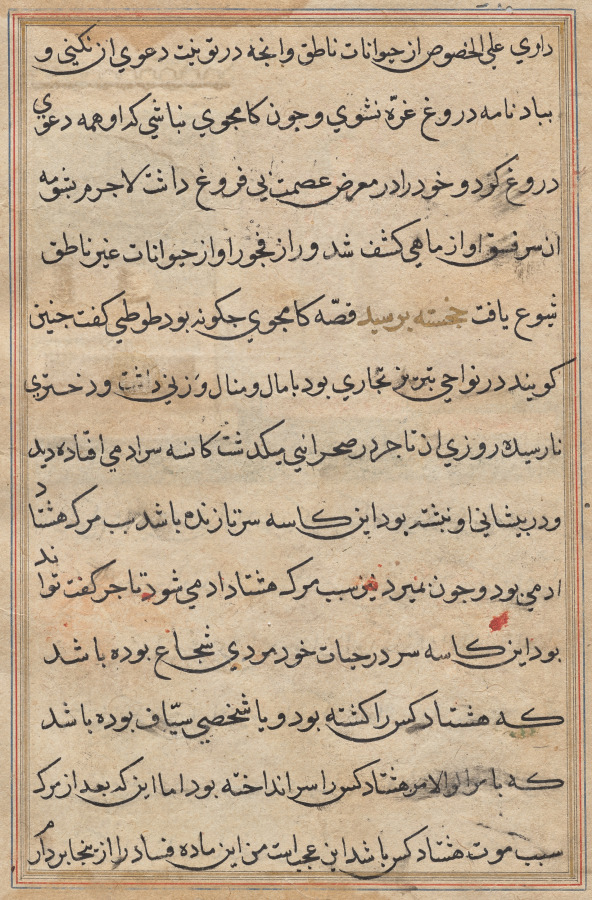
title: Page from Tales of a Parrot (Tuti-nama): text page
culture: Mughal India, court of Akbar (reigned 1556–1605)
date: c. 1560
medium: gum tempera, ink, and gold on paper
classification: Painting